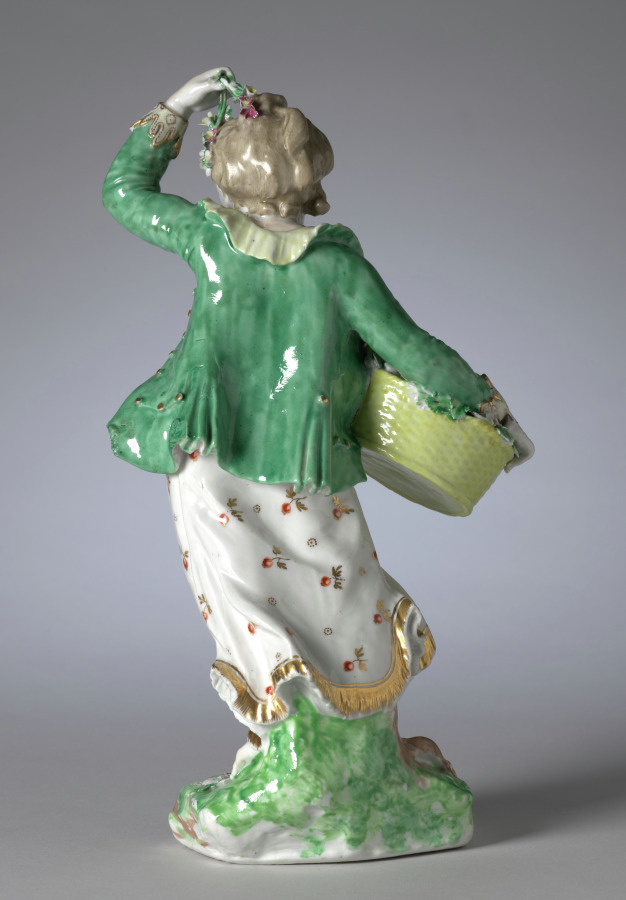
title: Figure of Spring from the Four Seasons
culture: England, Bristol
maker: Bristol Porcelain Factory (British, 1770–81)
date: c. 1775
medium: hard-paste porcelain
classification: Ceramic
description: The modern notion of childhood as a time of innocence and simplicity emerged during the second half of the eighteenth century. This understanding of adolescence led to numerous depictions of children as personifications of the four seasons. Here spring is portrayed as a young girl adorning her hair with flowers. The flowers filling her basket and growing in the grass around her signal spring’s arrival.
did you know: Allegorical figures most often decorated a table during the dessert course, providing amusing subjects for conversation.